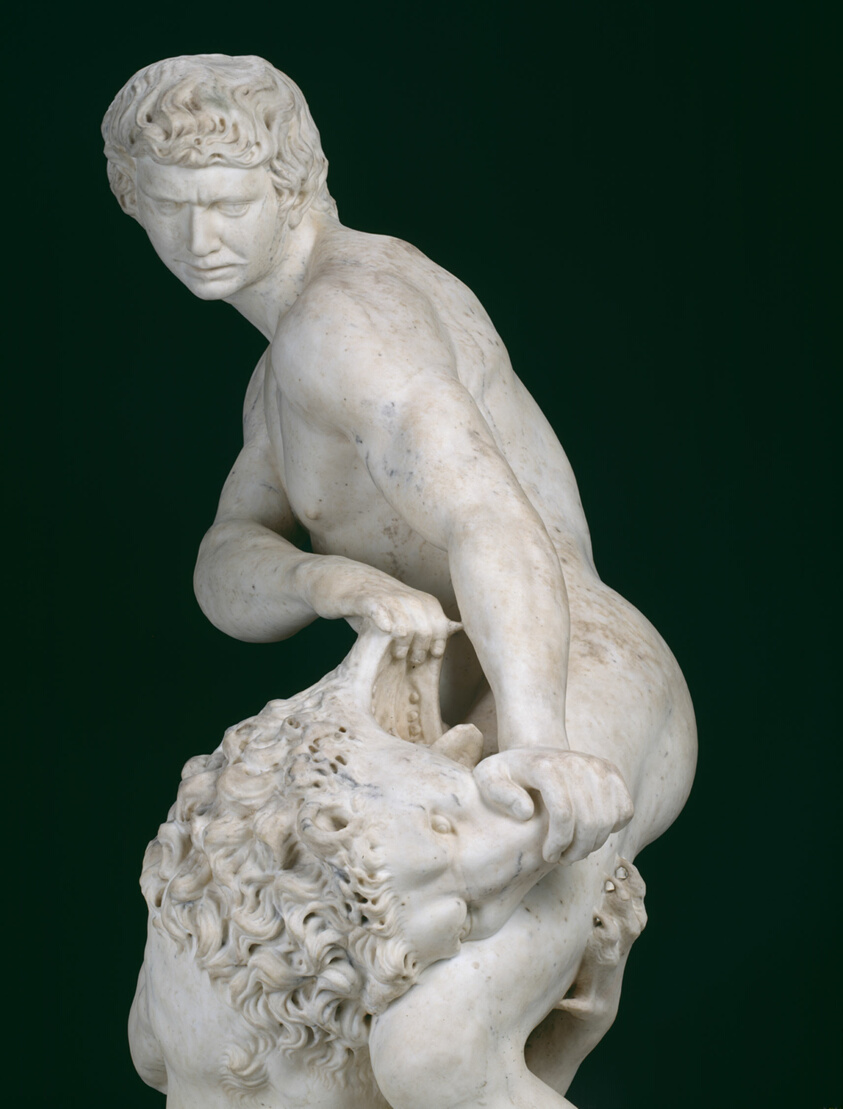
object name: Sculpture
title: Samson and the Lion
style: 17th Century, Baroque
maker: Cristoforo Stati (Italian, 1556–1619)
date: 1604–7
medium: Marble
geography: Italy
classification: large scale; sculpture; Italian; marble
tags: religious, Old Testament, religious scenes, nudes, man, figure, biblical, animals, lions, religious figures